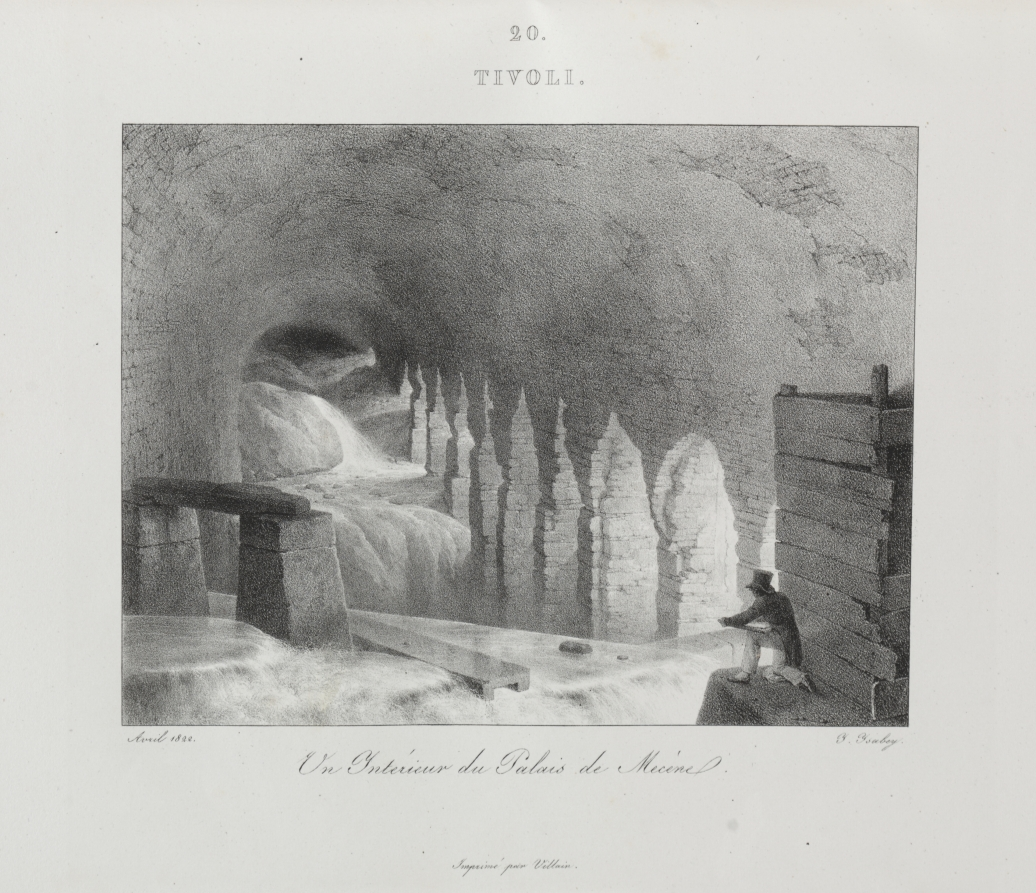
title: Voyage en Italie en 1822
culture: France, 19th century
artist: Jean-Baptiste Isabey (French, 1767–1855)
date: 1833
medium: lithograph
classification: Bound Volume